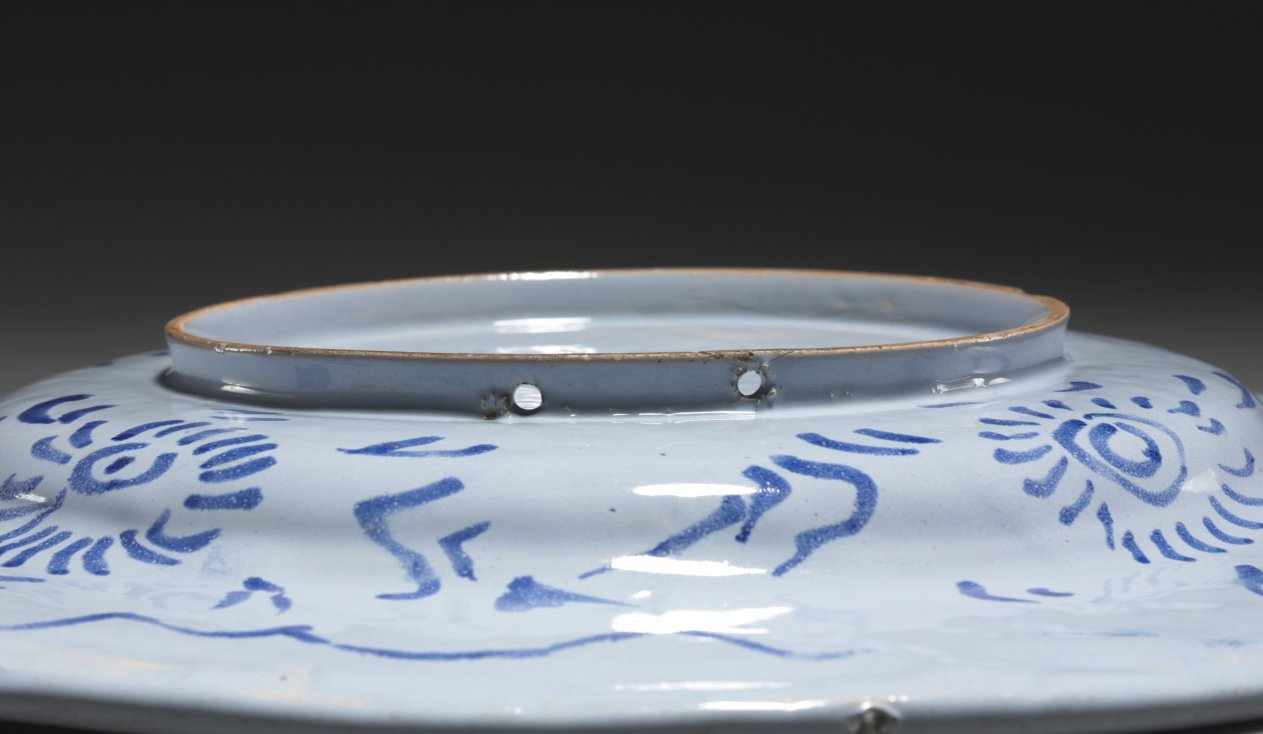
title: Large Plate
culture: France, late 17th Century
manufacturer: Nevers Factory (French)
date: late 1600s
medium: faience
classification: Ceramic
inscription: on front, inscribed: Moderata. durant.